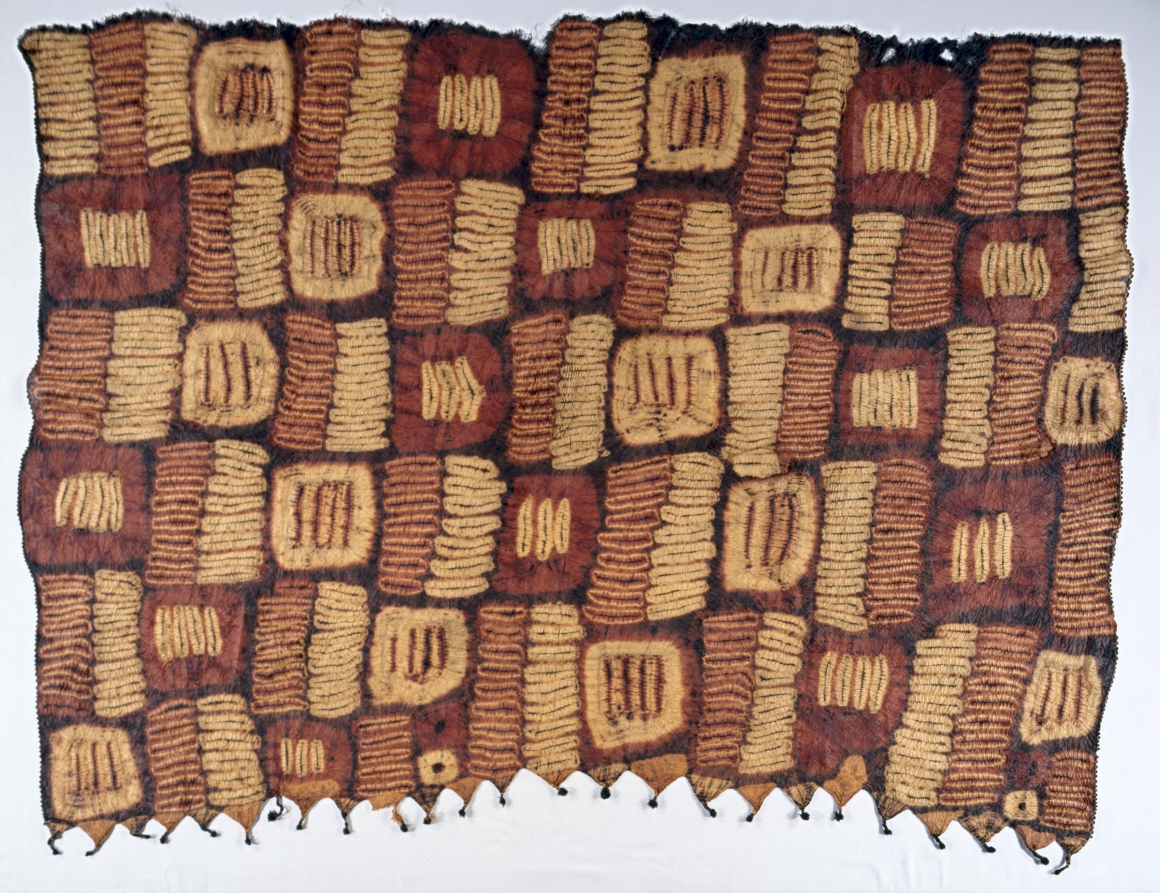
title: Man's Garment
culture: Africa, West Africa, Côte d'Ivoire, Dida-style weavers and dyers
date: possibly early 1900s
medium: Raffia palm fiber (Raphia ruffia or R. vinifera) and dye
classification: Textile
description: Displayed flat to highlight its designs and preserve its delicate fibers, this wrapper was meant to drape around the body. An elite man wore it with one corner over a shoulder, the knotted fringe skimming his ankles. The garment gained its earth-toned geometric patterns through plangi, a knot-and-twist resist dyeing technique; each color is applied in a different dye bath, from lightest to darkest. While their patterns are unique, these garments reflect regional influence: Dida women likely learned hand interlacing from Liberian Kpelle weavers. Such garments were given as gifts or worn on special occasions, at least into the 1990s.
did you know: The tying of fabric during the making of this garment gives its surface a distinctively "crinkled" texture.